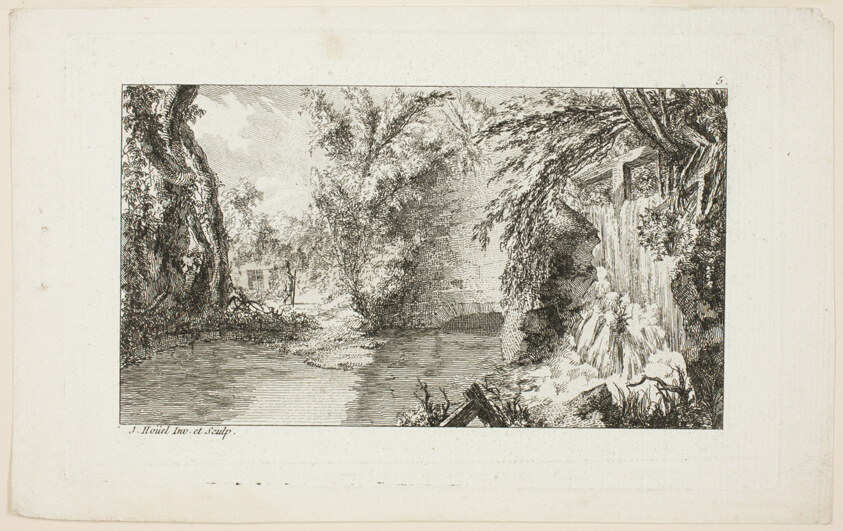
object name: Print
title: Landscape with a Walker and a Cascade, plate 5 from the second suite Livre de paysages (Book of Landscapes)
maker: Jean-Pierre-Louis-Laurent Hoüel; French, 1735-1813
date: 1758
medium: Etching in black on off-white laid paper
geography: France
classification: etching; print; prints and drawing